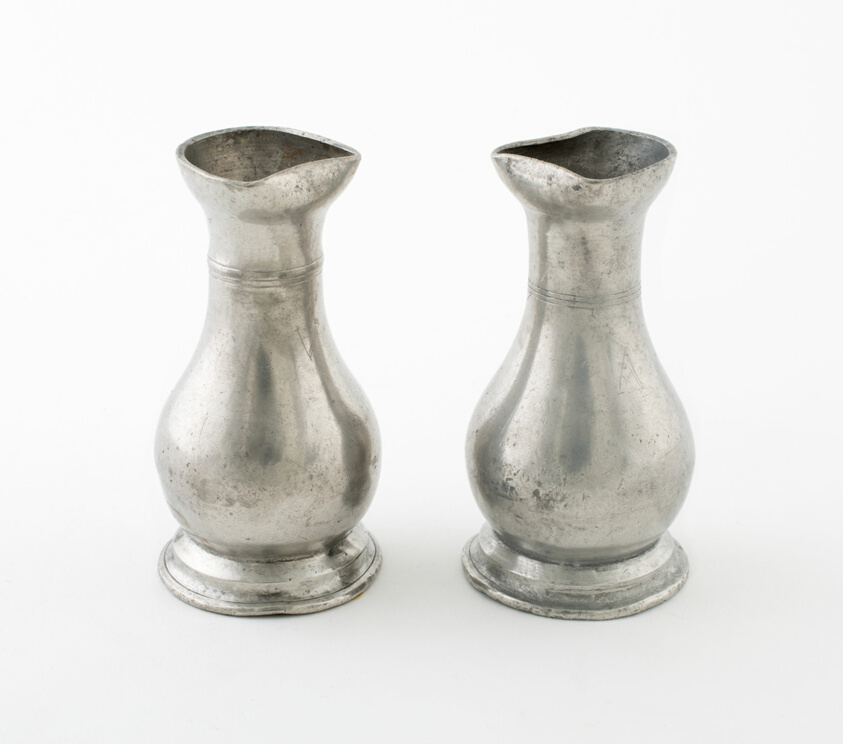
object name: Metalwork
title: Pair of Sacramental Cruets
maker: Probably France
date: Early 19th century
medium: Pewter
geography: France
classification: pewter; metalwork; european decorative arts